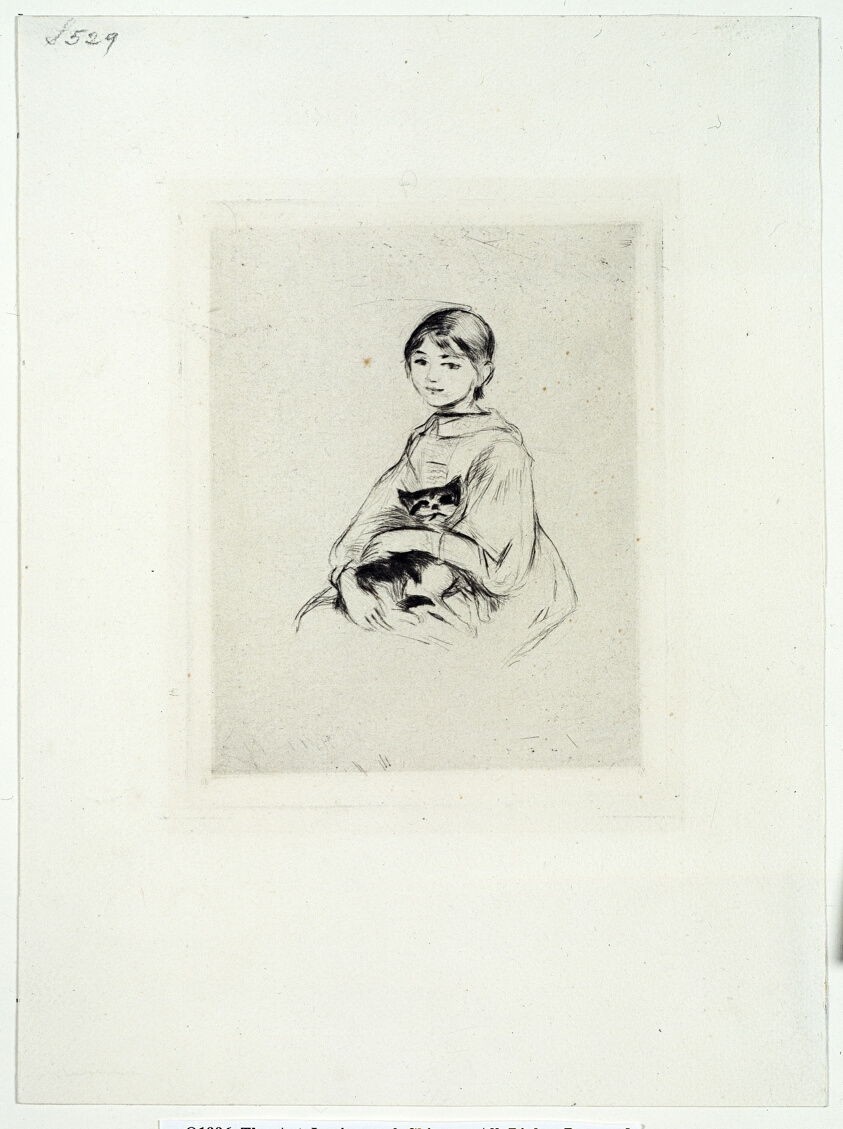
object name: Print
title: Young Girl with a Cat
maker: Berthe Morisot (French, 1841-1895); printed by Ernest Rouart (French, 1874-1942)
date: 1889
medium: Drypoint in black on cream laid paper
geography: France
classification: drypoint; print; prints and drawing